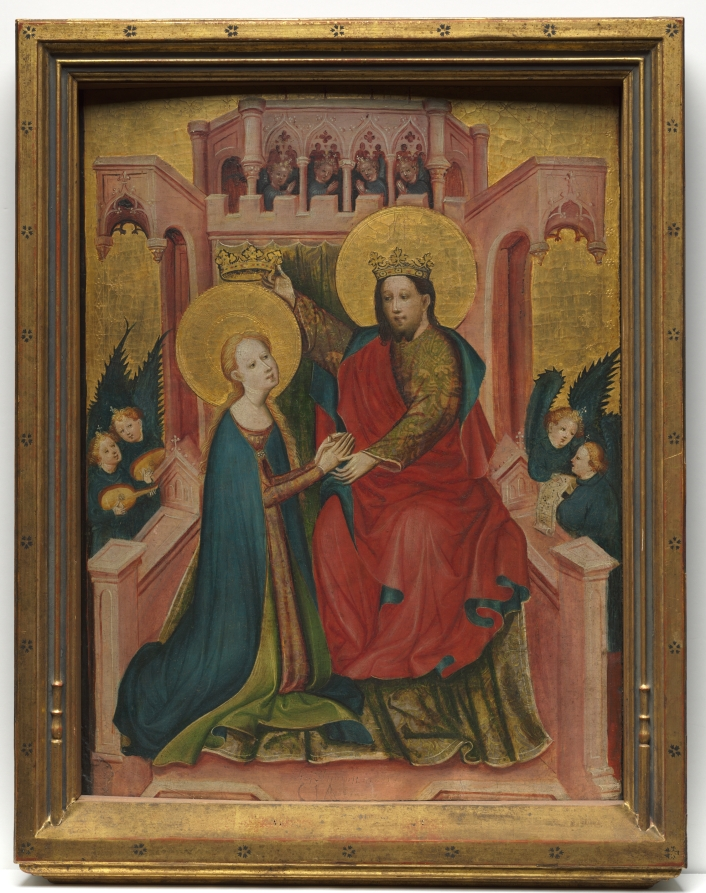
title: Coronation of the Virgin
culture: Germany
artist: Master of the Fröndenberg Altarpiece (German)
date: c. 1410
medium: tempera and gold on wood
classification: Painting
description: This panel once formed the left wing of an altarpiece originally located in a Cistercian convent in the German town of Fröndenberg. The Coronation of the Virgin was a common subject; though it is not based on a biblical text it often appeared in medieval books of hours as a focus of contemplation. It represents the culminating event in the life of Mary. Here, Christ and the Virgin are housed in an architectural setting; the Virgin kneels before Christ as he crowns her in the company of a group of angels. The color palette is particularly rich: pink, deep red, blue, and a delicate green as well as large areas of gold leaf. The well-developed, proportional figures, modeled drapery, and detailed architectural throne suggest an artist with a high level of experience and sophistication.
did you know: This is only one panel from what would have been a large altarpiece dedicated to the Virgin.